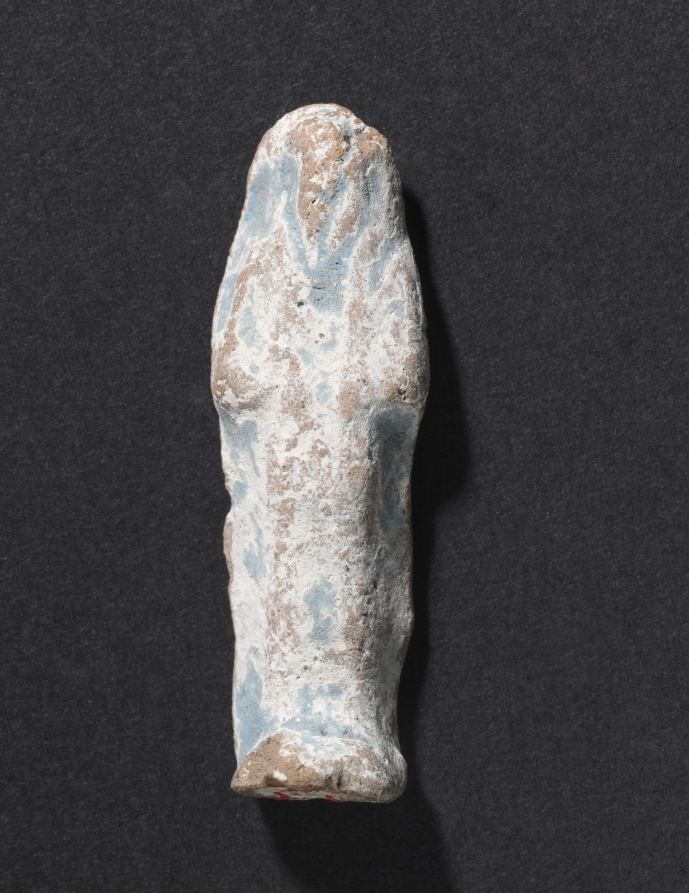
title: Shawabty of Ditamenpaankh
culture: Egypt, Late period (715–332 BCE), Dynasty 25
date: 715–656 BCE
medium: terracotta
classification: Funerary Equipment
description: High demand for shawabtys in the Late Period, a time when as many as 400 or more shawabtys were placed in the tomb with the deceased, gave rise to a specialized container for storing them: the shawabty box. This example is inscribed for the lady of the house, Ditamenpaankh, and was probably one of a pair originally made for her. The single-masted boat on the box's lid is perhaps an allusion to the pilgrimage of the deceased to the holy city of Abydos, the cult city of Osiris, king of the dead. The shawabtys inside are crude, mass-produced examples cast in an open mold. Made of terracotta, their blue paint imitates more costly shawabtys made of faience. As for the shawabty spell, it has been removed from its traditional location on the shawabty's front and relocated onto the sides of box, where it needed only to be written once, thus expediting production.